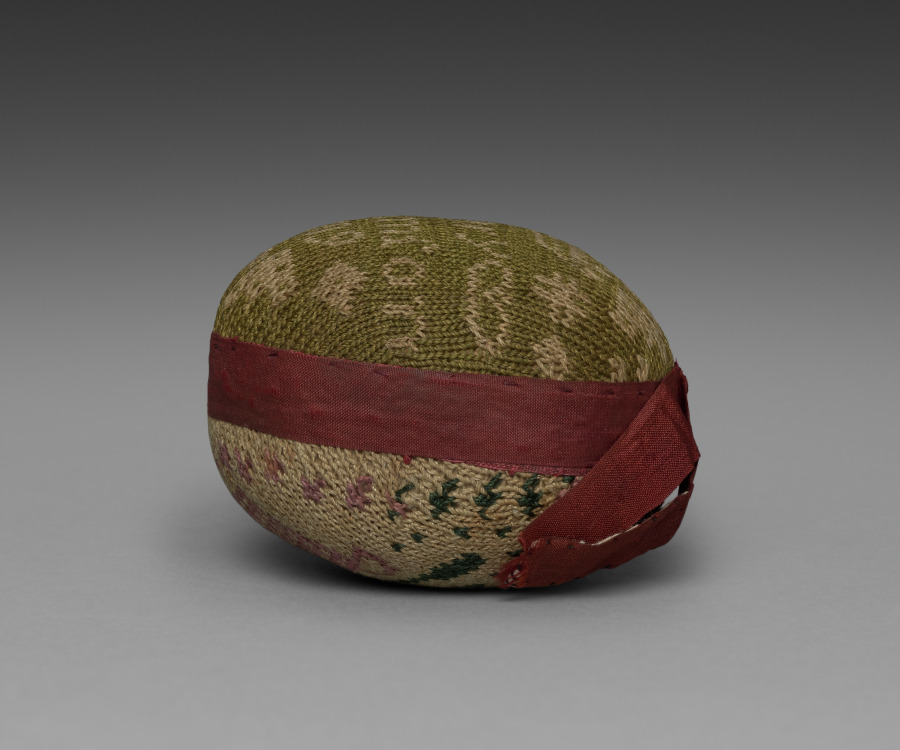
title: Pin Cushion Sampler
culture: England, 19th century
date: 1809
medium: Silk, knitted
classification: Sampler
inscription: "MARY WILLIAMSON 1809."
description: There is an inscription knit into this pin cushion, with the name Mary Williamson and the date 1809.